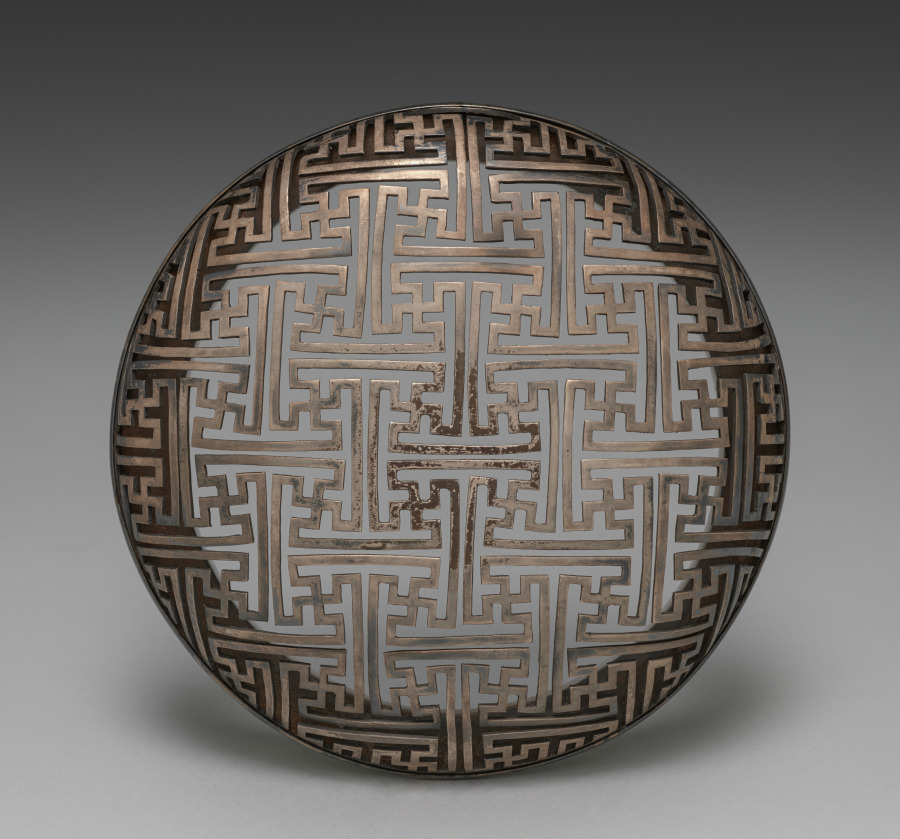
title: Lid for an Incense Burner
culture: Japan, Meiji period (1868–1912)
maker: Seifū Yohei III (Japanese, 1851–1914)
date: 1895–1914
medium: Geometric openwork silver lid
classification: Ceramic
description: Kyoto-based Japanese ceramist Seifū Yohei III (1851–1914) admired the glaze colors found on Chinese porcelain and tried to replicate them through intensive experimentation. His green and creamy white glazes were particularly well received. The combinations of colors with subtle molded and incised decorations in his ceramics respond powerfully to changes in light, creating a dynamic viewing experience. Names for the glazes, written in ink with a brush on the lids of the custom-made storage boxes for the works, often indicate a specific glaze or ware that had inspired him, even when the resulting color was distinctively his own.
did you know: The silver lid was produced outside the studio by metalwork specialists.